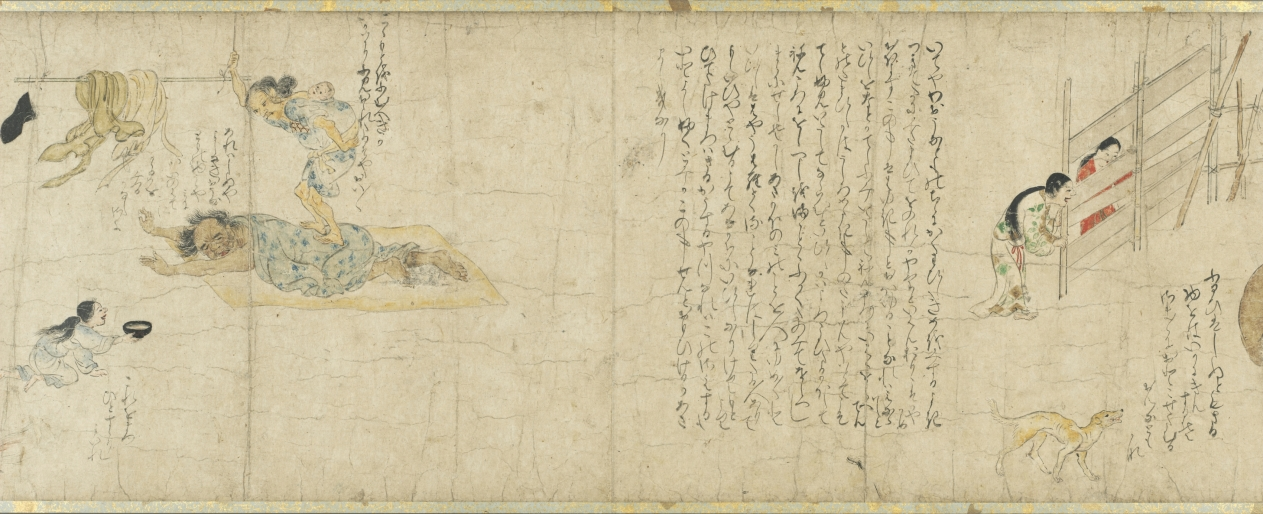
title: The Story of Fukutomi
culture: Japan, Muromachi period (1392–1573)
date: mid-1400s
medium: Handscroll; ink and color on paper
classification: Painting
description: This handscroll shows the second half of an odd tale in which a ne’er-do-well seeks the path to quick fortune and learns the art of musical flatulence. Prior to a major performance, a mentor (and competitor) advises him to consume morning glory seeds, a laxative. Thus, while performing he fouls himself and ends his days in humiliation. The audacious nature of this story and its presentation—well-animated figures with dialogue adjacent to the appropriate moments of action—create a primitive graphic novel. Japanese visual humor about farting preceded this story, but the satirical, mean-spirited twist in this tale suggests its intent was not merely to be humorous. The story was likely commissioned by court officials who disapproved of common performers rising to high positions, outflanking what was the accepted social order.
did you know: This scroll is treasured as the second oldest surviving version of this story.